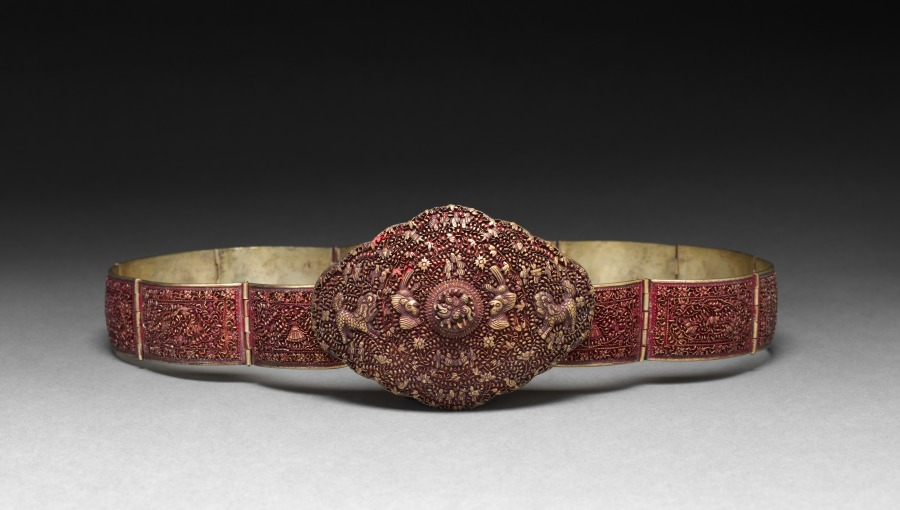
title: Belt with Buckle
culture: Siam, 19th century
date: 1800s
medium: brass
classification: Jewelry